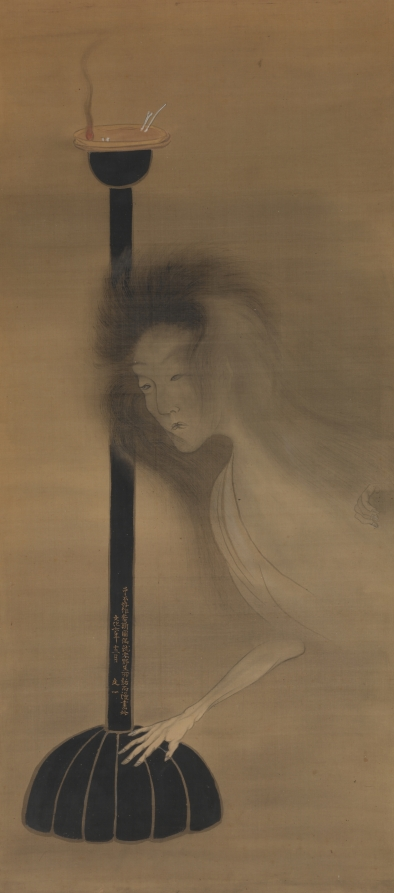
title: Ghost and Oil Lamp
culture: Japan, Edo period (1615–1868)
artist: Tani Bun'ichi (Japanese, 1787–1818)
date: 1810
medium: hanging scroll, ink, color, and gold on silk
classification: Painting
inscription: artist's inscription on stem of oil lamp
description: Tani Bun’ichi was the adopted son of Tani Buncho (1763-1840), a master painter and connoisseur. A Bun’ichi painting remarkably similar to this one that depicts a ghost by a lacquer lamp stand, is in the collection the Tokyo temple Zensho-an. That painting once belonged to Sanyutei Encho (1839-1900), a famed raconteur of ghost stories who donated his collection of ghost paintings to the temple. An inscription in gold on the lamp stand in this painting, identical in content to that on the Zensho-an painting, indicates that it was executed in the 12th month of 1810. Bun’ichi explains that he did not like painting ghosts, but tried it out after listening to a person by the name of Ono.